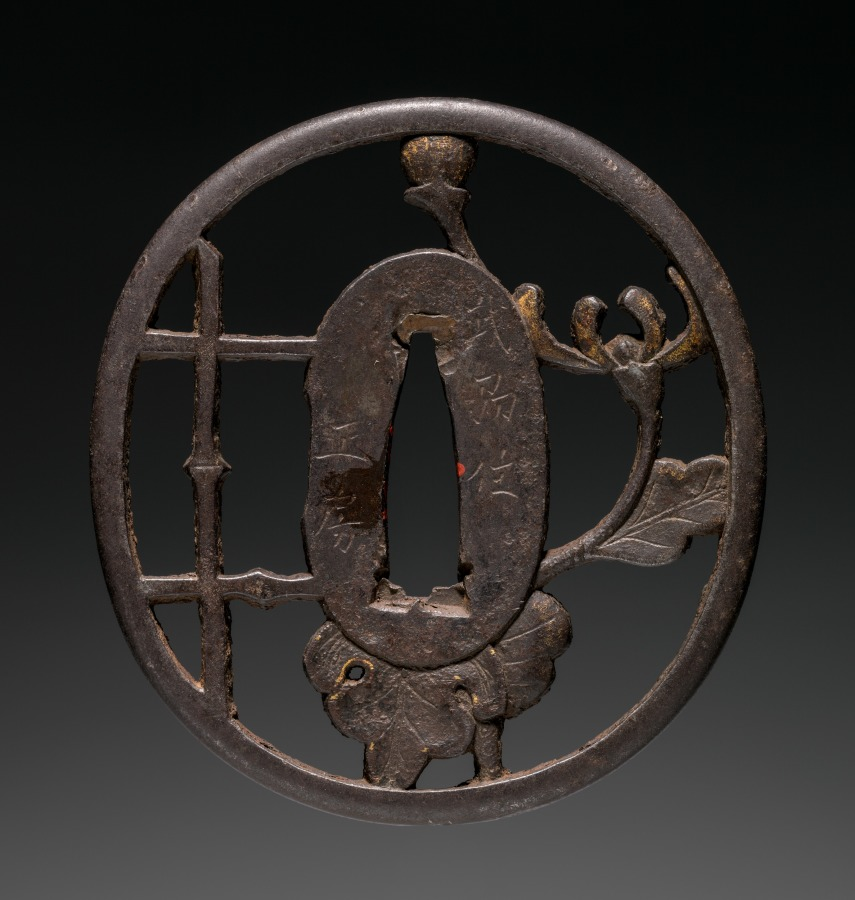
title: Sword Guard (Tsuba) with Fence and Flower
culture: Japan, possibly Edo period (1615-1868)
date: c. 1615–1868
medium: iron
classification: Arms and Armor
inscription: 武州住正房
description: An inscription on one side of this sword guard states that the maker went by the first name of Masafusa, and worked in the historical province of Musashi. This area includes modern Tokyo.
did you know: The signature could be that of Itō Masafusa, or added later by someone else as an attribution.